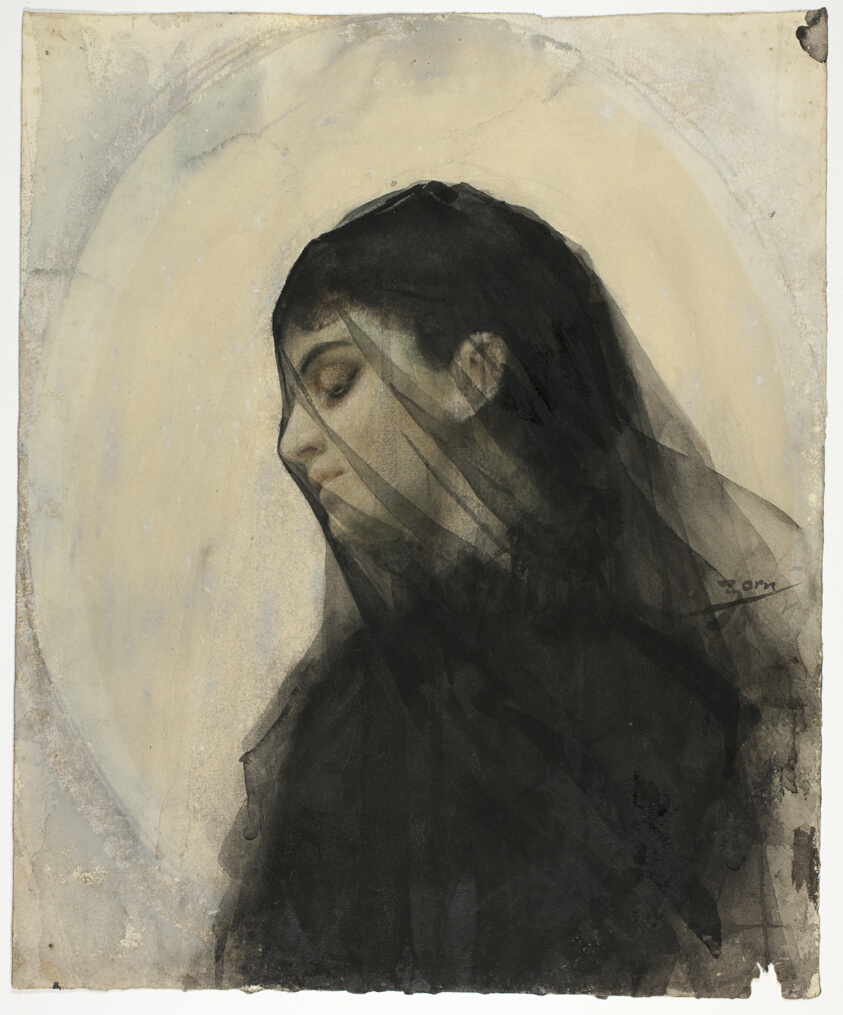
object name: Drawing and Watercolor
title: Head of a Veiled Woman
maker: Anders Zorn (Swedish, 1860-1920)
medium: Watercolor on ivory wove paper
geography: Sweden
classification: paper; watercolor; prints and drawing